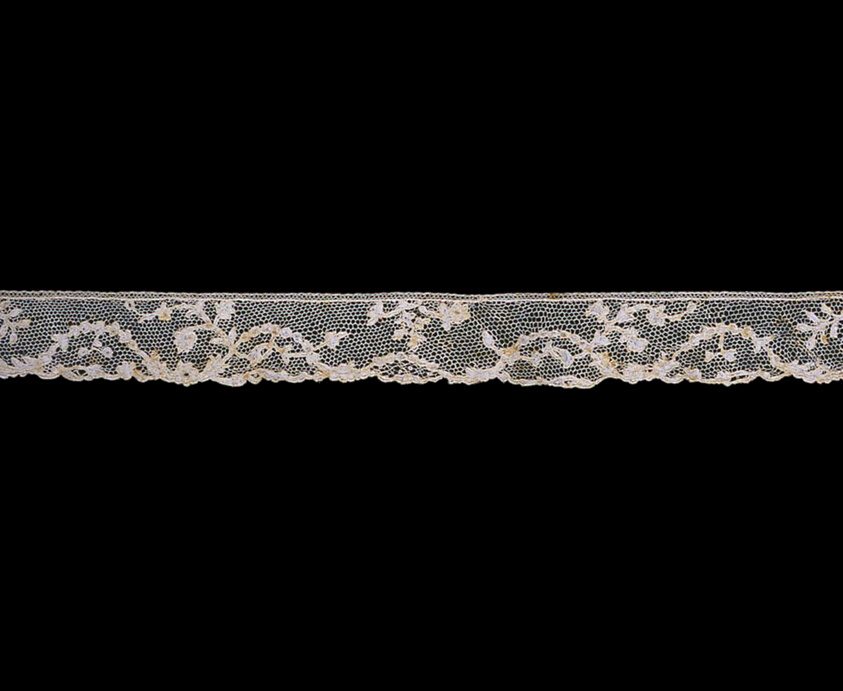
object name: Textile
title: Border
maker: France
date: 1770s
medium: Linen, needle lace of a type known as "Point d'Argentan" with bottonholed mesh ground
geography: France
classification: textile; lace - needle; lace